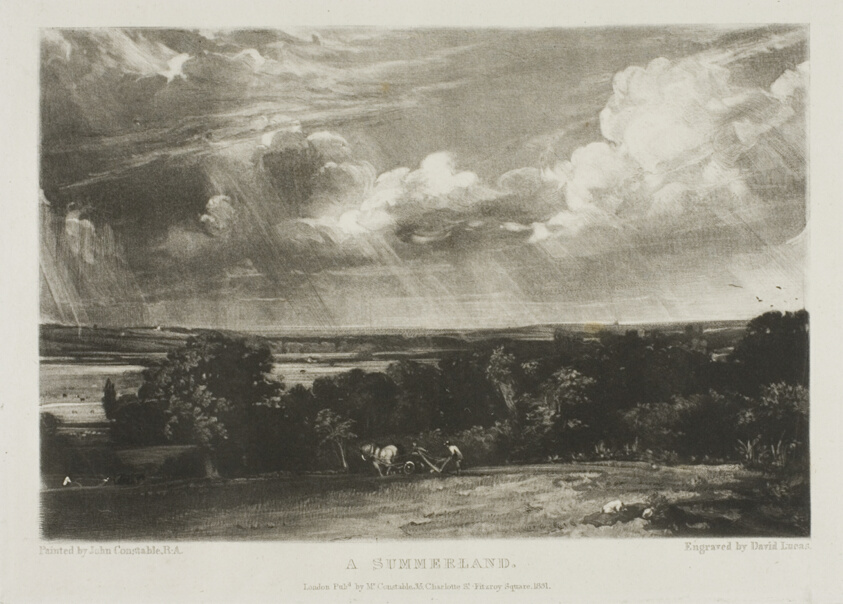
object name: Print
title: A Summerland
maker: David Lucas (English, 1802-1881); after John Constable (English, 1776-1837)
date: 1831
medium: Mezzotint on paper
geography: England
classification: mezzotint; print; prints and drawing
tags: landscapes